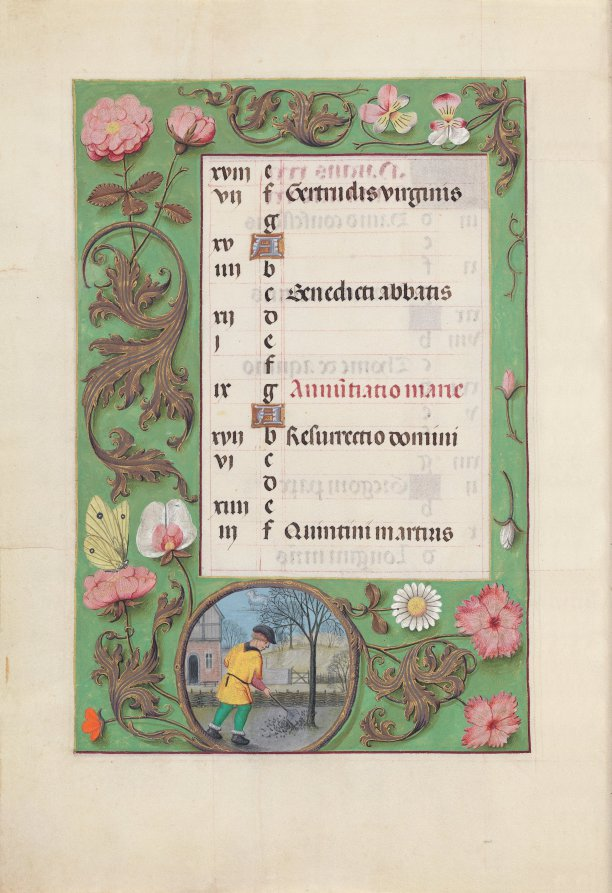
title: Hours of Queen Isabella the Catholic, Queen of Spain: Fol. 4v, March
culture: Flanders, Ghent and Bruges, late 15th century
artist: Master of the First Prayerbook of Maximillian (Flemish, c. 1444–1519)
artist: and Associates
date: c. 1500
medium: ink, tempera, and gold on vellum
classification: Bound Volume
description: This manuscript was illuminated by a circle of at least five highly organized manuscript painters active in the Flemish cities of Ghent and Bruges. The principal illuminator was Alexander Bening, who painted the majority of the book's miniatures. Manuscripts produced by this circle of artists are renowned for the decoration of their borders, which typically feature a rich variety of realistically painted flowers, birds, and butterflies. This prayer book, called a book of hours, was intended not for a cleric but for the private devotions of a lay person—in this case, Isabella the Catholic, Queen of Spain (1451–1504); her coat of arms embellishes the book's frontispiece. It is unlikely that the book was commissioned by the Queen herself; rather, she probably received it as a diplomatic gift from someone courting her patronage, perhaps Cardinal Francisco Jimenez de Cisneros. A Franciscan friar, Jimenez was dependent upon Isabella for his advancement, first to the post of Queen's confessor in 1492, and then to Archbishop of Toledo in 1495.